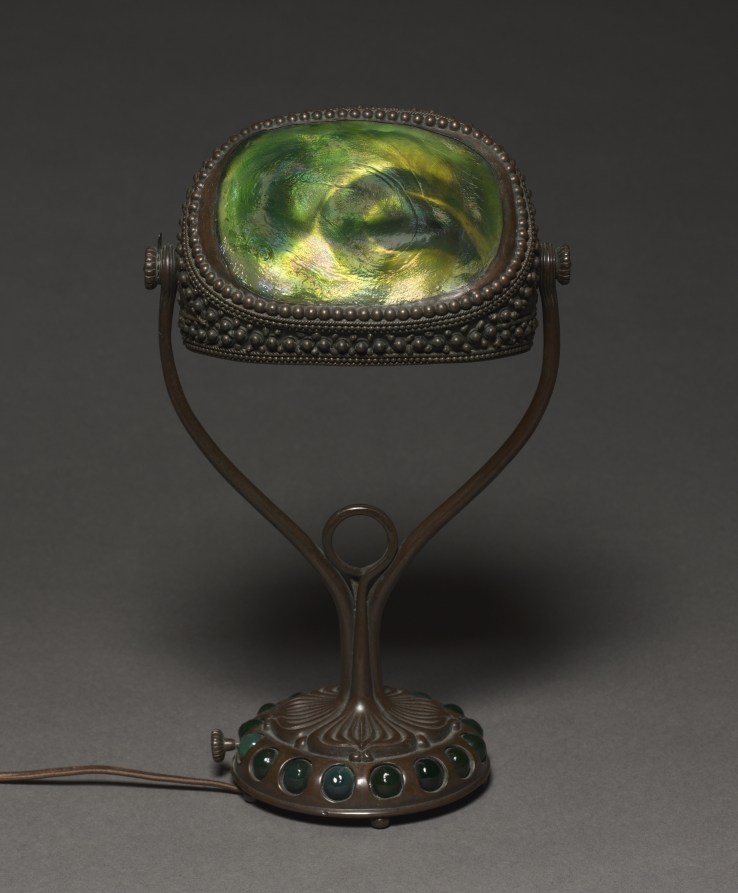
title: Turtleback Reading Lamp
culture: America, New York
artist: Tiffany Glass & Decorating Company (America, New York, 1892–1902)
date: c. 1895–1902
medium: Favrile glass, bronze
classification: Lamp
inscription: stamped on underside: TGD Co/Tiffany Studios/New York/D545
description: By 1900 Louis Comfort Tiffany had expanded his empire by increasing the firm’s production of “fancy goods,” including inkstands, candlesticks, clocks, small boxes, desk sets, tea screens, and other functional objects, such as this small reading lamp for a desk. These smaller, more affordable luxury items were designed with as much thought to artistry as the great stained glass windows and table lamps through which the firm enjoyed unrivaled success.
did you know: Louis Comfort Tiffany called the large pieces of cast glass with irregular shapes "turtleback," because they resemble the craggy shapes of a turtle's shell.